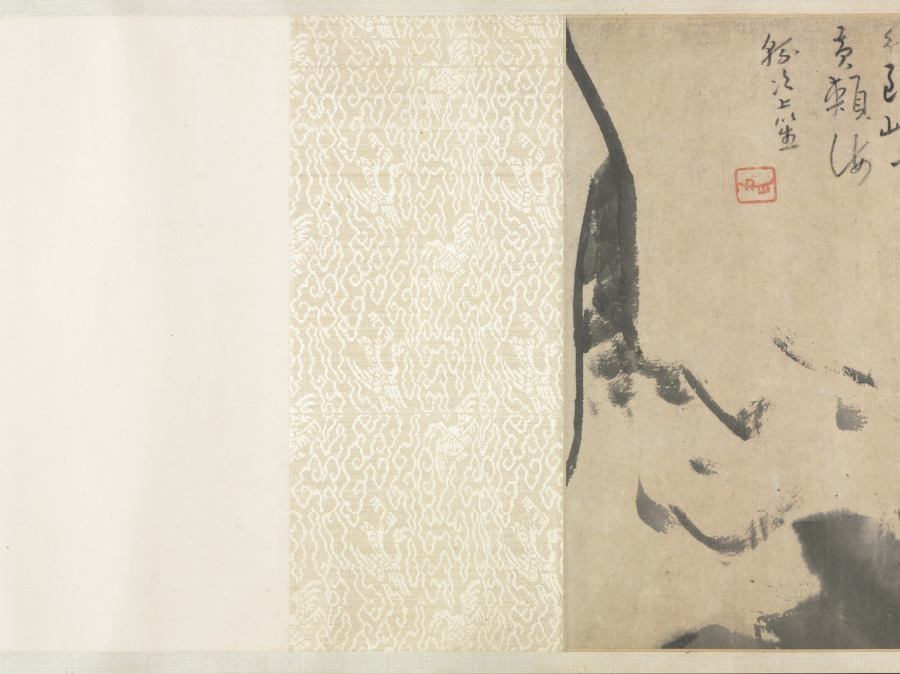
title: Fish and Rocks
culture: China, Qing dynasty (1644-1911)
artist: Bada Shanren (Chinese, 1626–1705)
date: mid- to late 1600s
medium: Handscroll; ink on paper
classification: Painting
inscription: 去天纔尺五，只見白雲行。 云何畫黃花，雲中是金城。 [印] 个山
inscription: 雙井舊中河，明月時延佇。 黃家雙鯉魚，為龍在何處。 [印] 个山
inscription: 三萬六千頃，畢竟有魚行。 到此一黃頰，海潮次上笙。 [印] 个山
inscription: 5 additional seals: 2 of Zhang Daqian 張大千 (1899–1983); 1 of Ta-an Chü-shih; 2 unidentified.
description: Bada Shanren, also called Zhu Da, a 17th-century painter who rejected conventions in favor of an individual, personal expression, is known for his unorthodox compositions of fish, flowers, birds, and rocks. Fish in his paintings are often looking upward toward heaven, swimming in a pond of undefined space. As a member of the Ming imperial family, Zhu Da lost his princely status and hid in a monastery when the Manchus, foreigners from the north, established the Qing dynasty in 1644. This scroll may have some autobiographical meaning, representing fish as leftover subjects (yimin) who lived in a void, having lost their roles in life after the fall of the dynasty.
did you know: After each poem, Bada Shanren used his so-called jixingyin seal 屐形印, which resembles the impression of a shoe on soft mud.